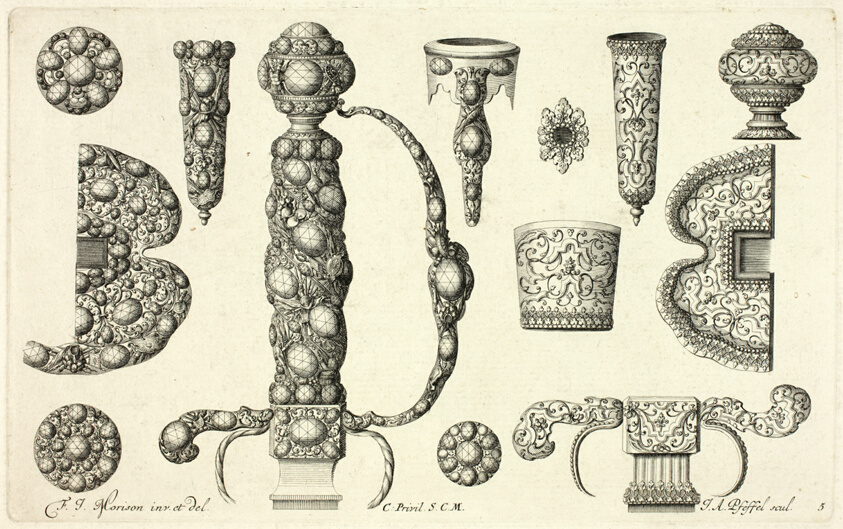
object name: Print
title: Designs for Jewelry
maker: Joannes Andreas Pfeffel I (German, 1674-1748); after Friedrich Jacob Morisson (German, active 1693-1697)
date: before 1697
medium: Engraving on cream laid paper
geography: Germany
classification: engraving; print; prints and drawing